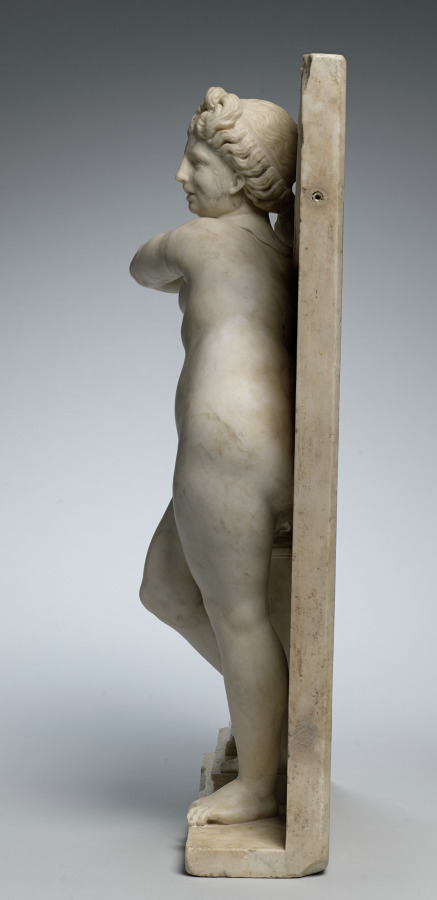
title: Dido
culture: Italy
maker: Aurelio Lombardo (Italian, 1501–1563)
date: c. 1525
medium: marble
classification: Sculpture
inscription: PVNICA SVM [DIDO ERE]XI QVAE MOENIA BYRSA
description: Artists customarily portrayed Dido as a forlorn lover abandoned by the Trojan hero, Aeneas, but here she is a conquering queen. Dido draws aside an oxhide curtain, a reference to the mythical founding of Carthage (in modern-day Tunisia, North Africa), when she was given an oxhide to demarcate granted land. By cutting it into thin strips she was able to encircle the future city. Dido was likely created for display in a studiolo, a place of study featuring refined works of art appreciated by humanist scholars and aficionados during the Renaissance.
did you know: Dido’s nudity and hairstyle are allusions to ancient Greek images of Aphrodite.